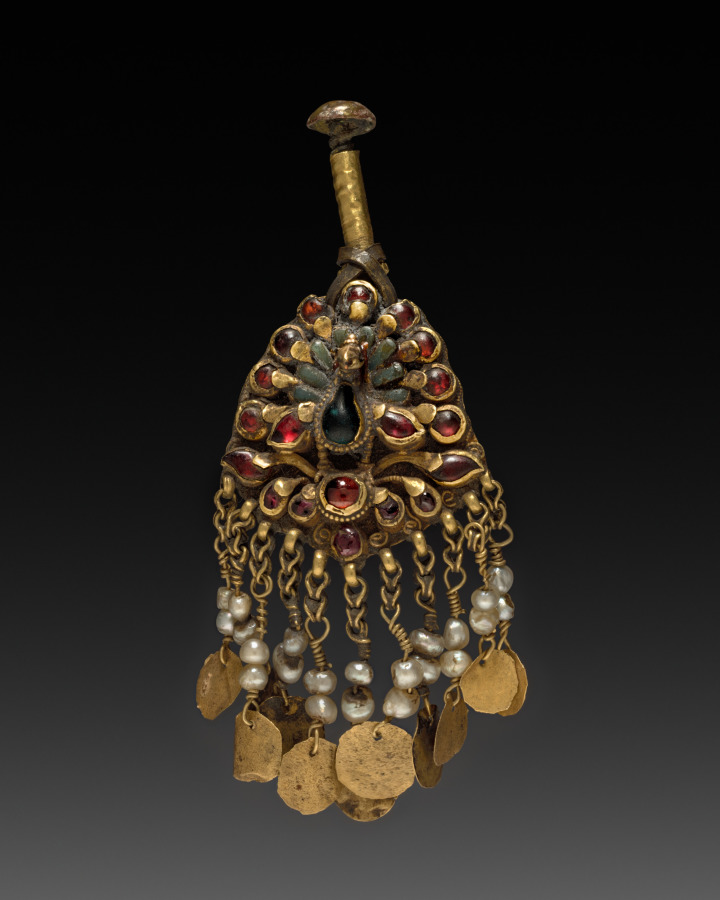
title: Ornament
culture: Nepal, Kathmandu Valley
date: 1600s-1700s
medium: gold with jewels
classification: Jewelry